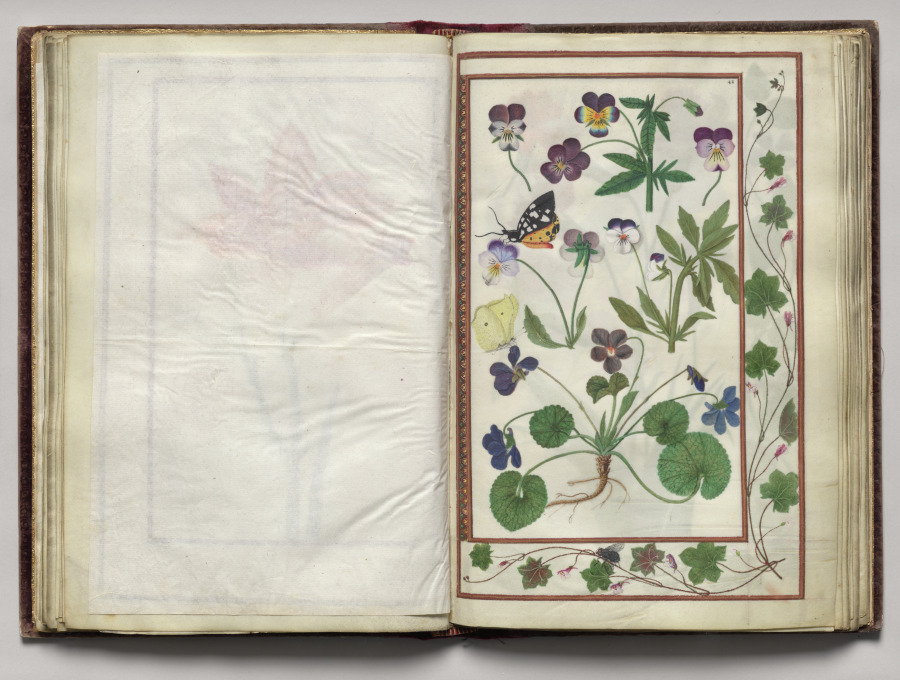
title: Violas with Leaf and Fly Border, folio 21 (recto), from Florilegium (A Book of Flower Studies)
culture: France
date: 1608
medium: watercolor, ink, silver, and gold over occasional traces of pencil, on vellum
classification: Bound Volume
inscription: Dated: Poitiers 1608 (on frontispiece) Signed: On frontispiece in black ink, lower right: Van Kuyk Notation on drawing: Frontispiece: in pencil, lower margin: * élève de Van Kessel, peintre flammand (* in pencil also appears in front of Van Kuyk's name).